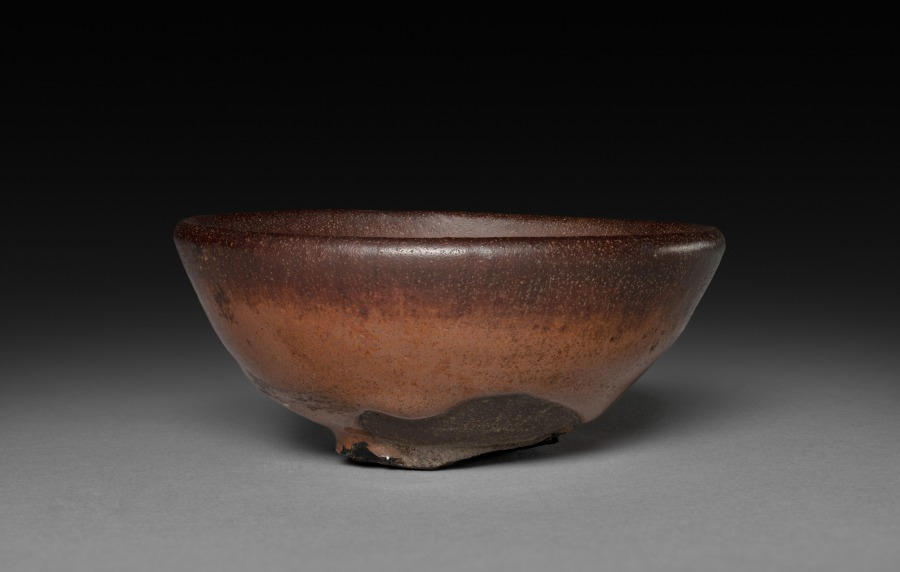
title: Tea Bowl: Jian ware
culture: China, Fujian province, Song dynasty (960-1279)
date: 960– 1279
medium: stoneware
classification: Ceramic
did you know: Jian ware was very popular with the tea cultures in China and Japan.